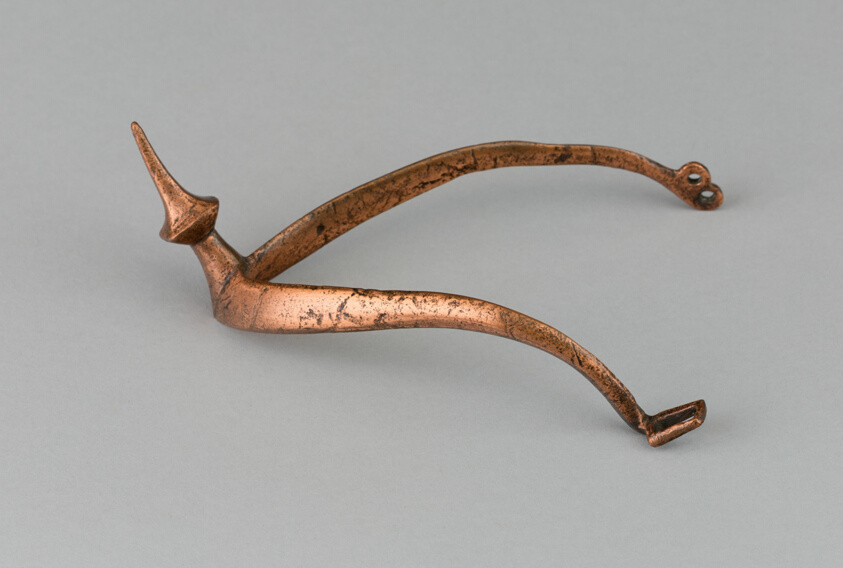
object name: Armor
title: Prick Spur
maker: German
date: c. 1300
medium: Iron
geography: Germany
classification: horse equipment; armor; arms and armor